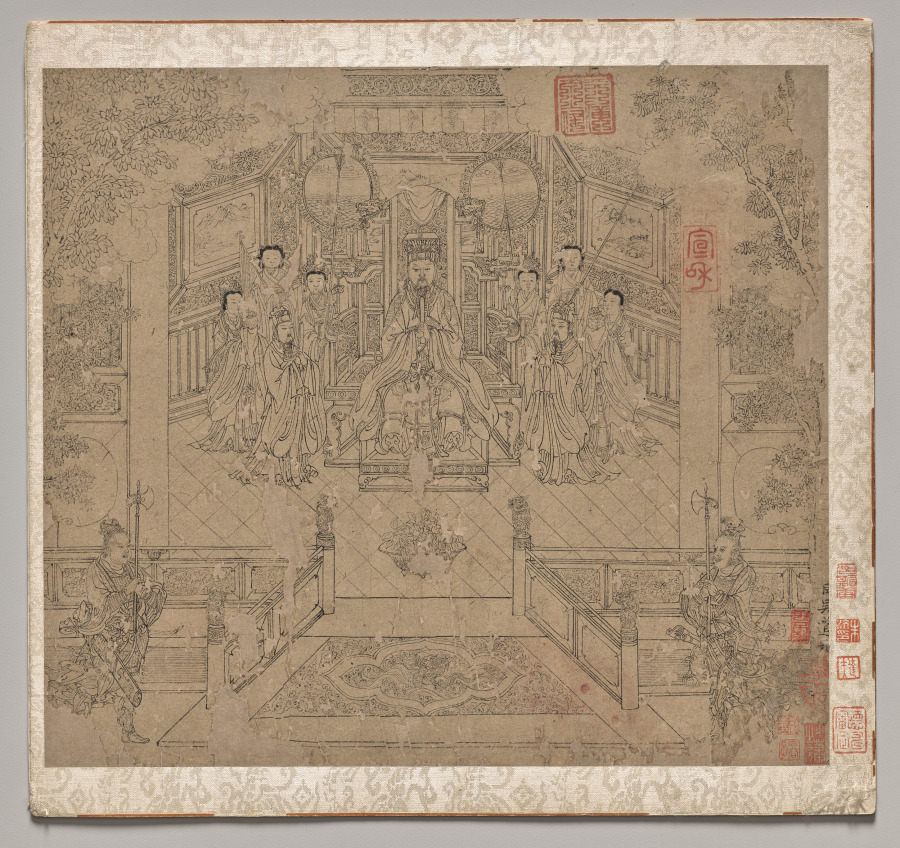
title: Album of Daoist and Buddhist Themes: Procession of Daoist Deities: Leaf 1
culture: China, Southern Song dynasty (1127-1279)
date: 1200s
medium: Album, ink on paper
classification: Painting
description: Leaf 1 portrays one of the three supreme deities in the Daoist religion. Dressed in a garment and hat similar to that of an earthly emperor, this heavenly being holds a tablet in a posture also reminiscent of a mortal ruler. He is shaded by a pair of fans, surrounded by female consorts and their maidens, and attended by ministerlike figures on both sides. Again, as seen in the mundane world, two guards holding weapons stand immediately in front of and below the platform that supports this majestic figure. Despite the symmetry and hierarchical composition, the whole scene comes alive in a wonderful sense of clarity and subtlety. Sketched in fine lines and evincing a wonderful sense of flow, especially in the draperies, the figural group is fully integrated in an architectural setting that is just as exquisite.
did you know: A pot of purple crepe myrtle blossoms (ziwei 紫微) is directly before the Ziwei Emperor 紫微大帝.